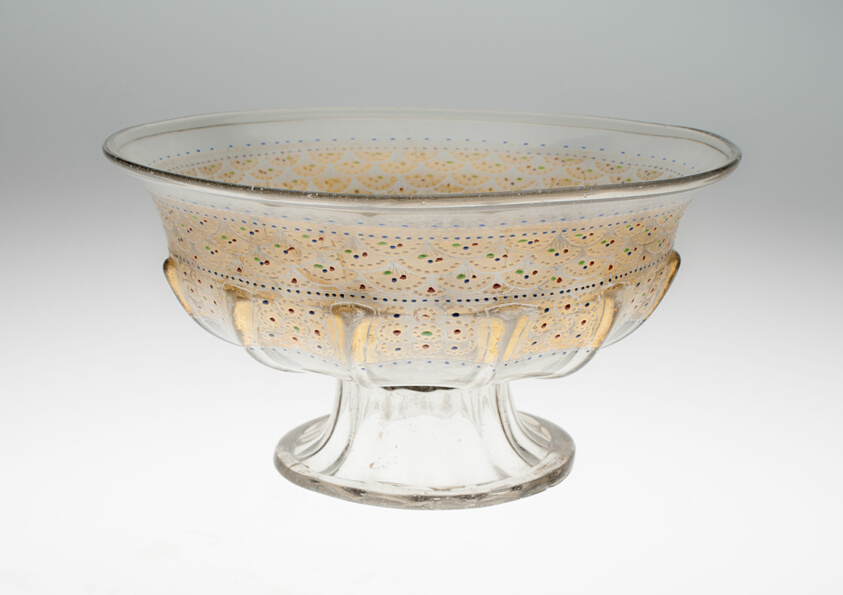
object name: Glass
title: Standing Bowl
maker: Italian; Venice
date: 1490/1500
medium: Colorless glass with enamel and gilding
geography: Murano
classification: glass; european decorative arts; decorative arts